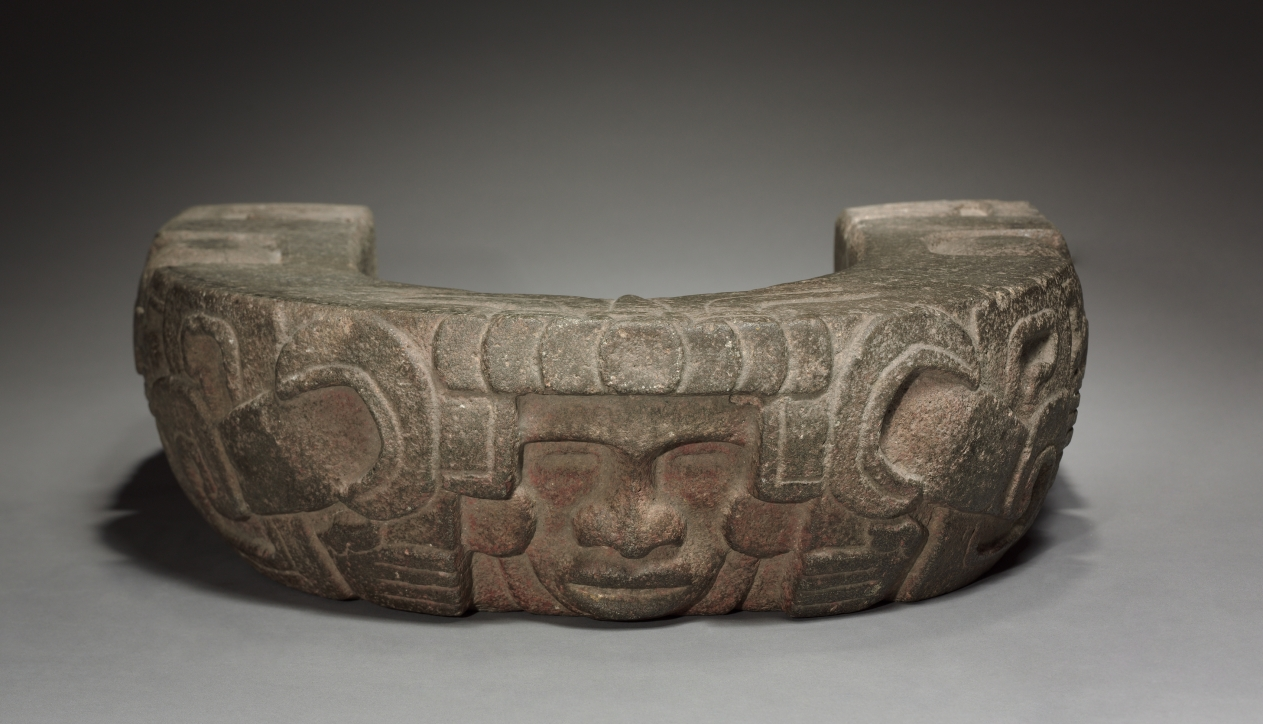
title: Yoke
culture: Mexico, Classic Veracruz Style, 7th-10th Century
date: c. 600–900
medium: stone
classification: Sculpture